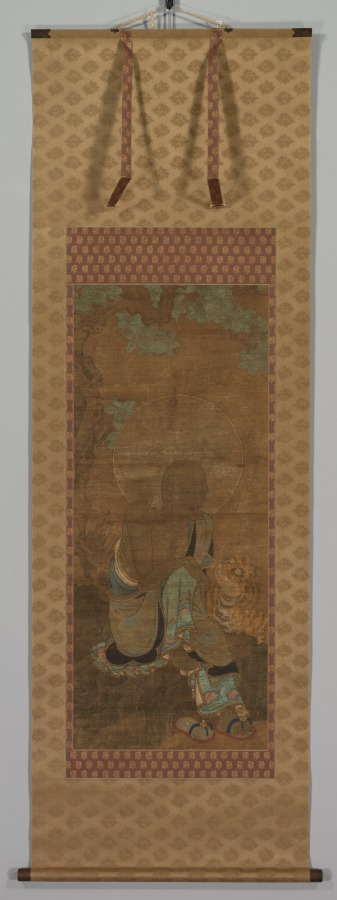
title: Rakkan (Arhat)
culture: Japan, Kamakura period (1185–1333) to Nanbokuchō period (1336–92)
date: 1300s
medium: hanging scroll; ink, color, and cut gold (kirikane) on silk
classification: Painting